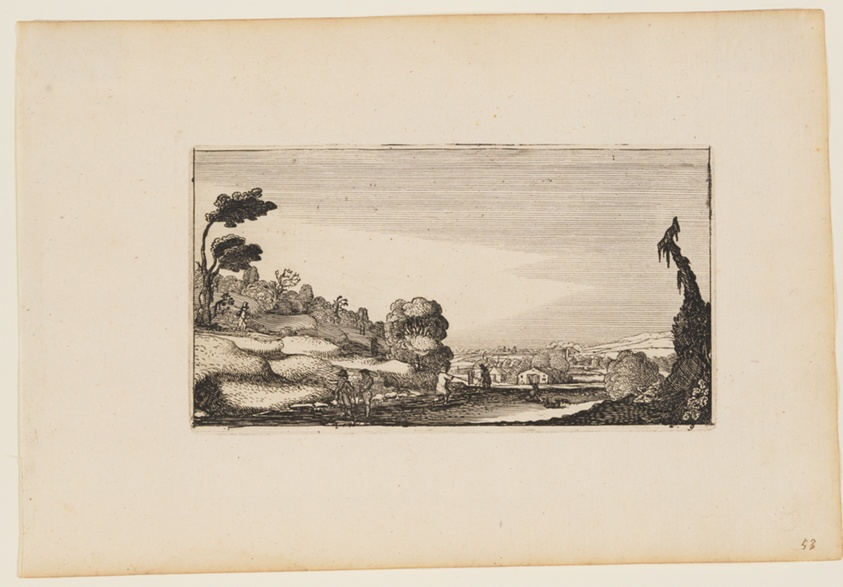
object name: Print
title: Hilly Panorama, from Twelve landscapes with Figures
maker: After Gillis van Scheyndel; Dutch, 1595–1660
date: 1624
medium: Etching on ivory laid paper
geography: Netherlands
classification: etching; paper; print; prints and drawing